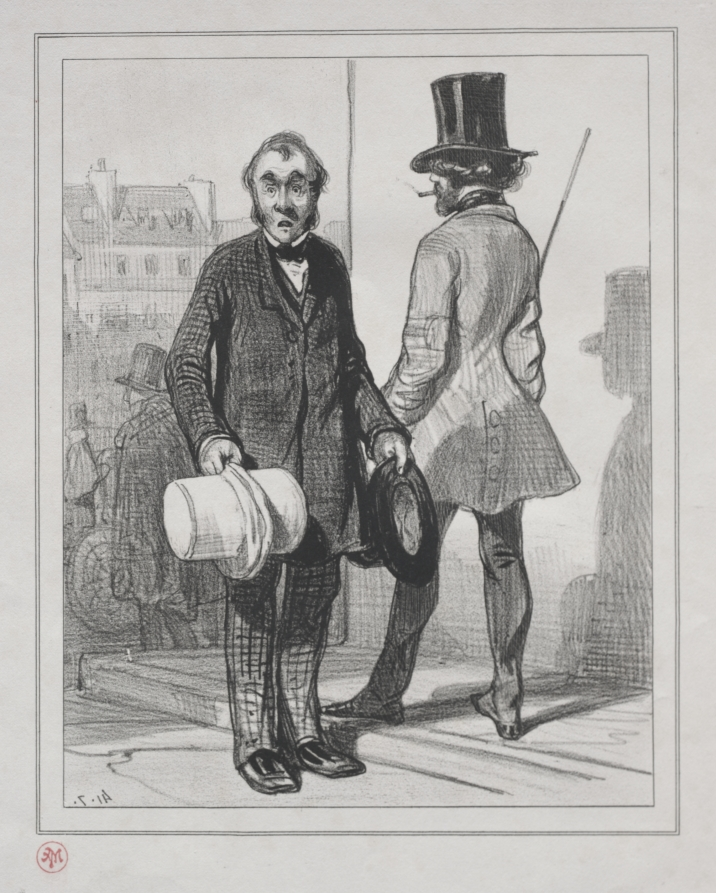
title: The Life of a Young Man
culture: France, 19th century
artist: Paul Gavarni (French, 1804–1866)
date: c. mid-1800s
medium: lithograph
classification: Print